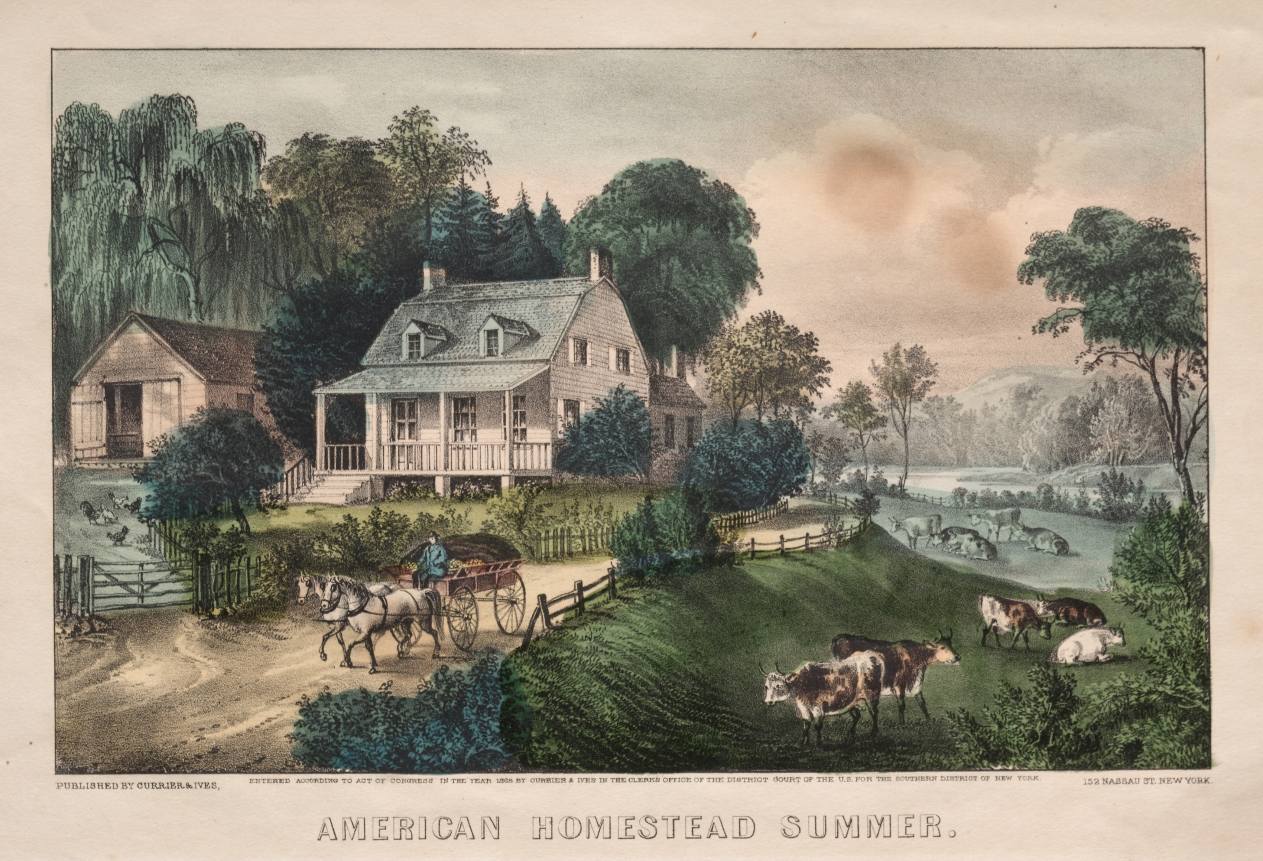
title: American Homestead, Summer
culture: America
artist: and James Merritt Ives (American, 1824–1895)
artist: Nathaniel Currier (American, 1813–1888)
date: 1869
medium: lithograph, hand colored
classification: Print